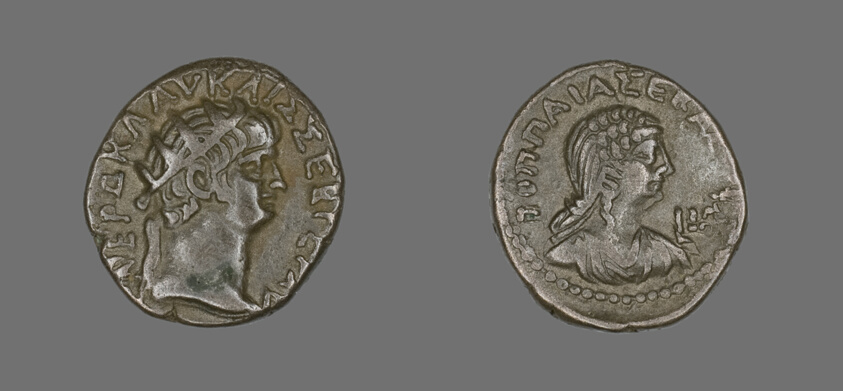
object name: Coin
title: Tetradrachm (Coin) Portraying Emperor Nero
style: roman period (egyptian), greco-roman (egyptian)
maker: Roman, minted in Alexandria, Egypt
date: 64-65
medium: Billon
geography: Egypt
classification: coin; ancient art